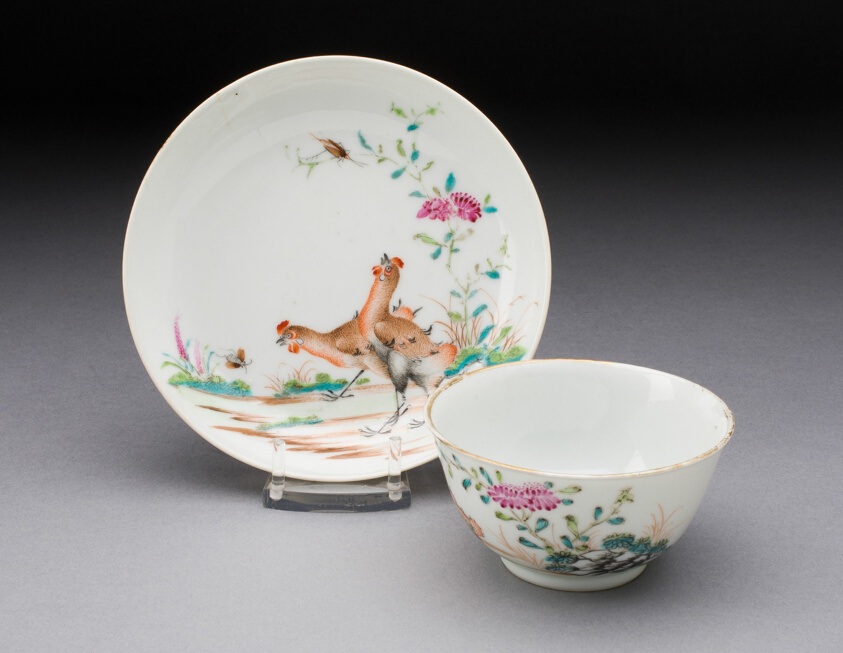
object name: Ceramics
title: Tea Bowl and Saucer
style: chinese export, Chinese (culture or style), East Asian, asian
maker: China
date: c. 1750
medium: Hard-paste porcelain with polychrome enamels and gilding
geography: China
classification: drinking vessel; chinese export porcelain; porcelain; european decorative arts; ceramics